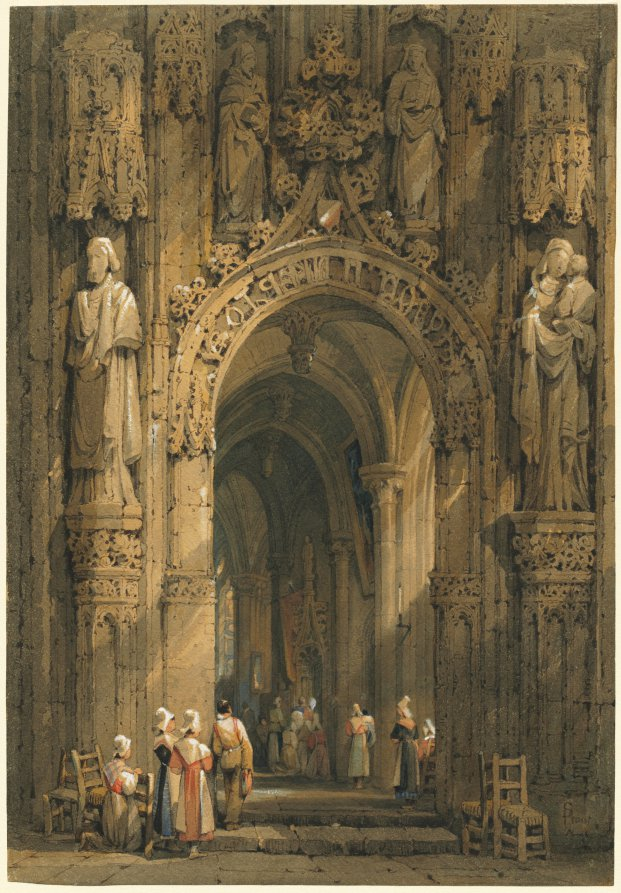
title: Interior of a Cathedral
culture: England, 19th century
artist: Samuel Prout (British, 1783–1852)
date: c. 1820s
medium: gray and brown wash with point of brush and pen and brown ink with watercolor heightened with gouache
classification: Drawing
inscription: signed, in brown ink, at lower right: SProut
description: Samuel Prout’s watercolors of picturesque views and architectural marvels of Italy, France, Germany, and Switzerland attracted a wide audience, helped inspire travel, and shaped the English perception of Continental Europe. The influential critic John Ruskin became a close friend, neighbor, and great supporter of the artist, declaring in the Art Journal in 1849 that no other artist expressed architectural detail in more "splendid accumulation" or "patient love" than Prout.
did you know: Rather than showing a specific church, this drawing seems to depict an amalgamation of Gothic architecture, capturing a mood and not a particular place.